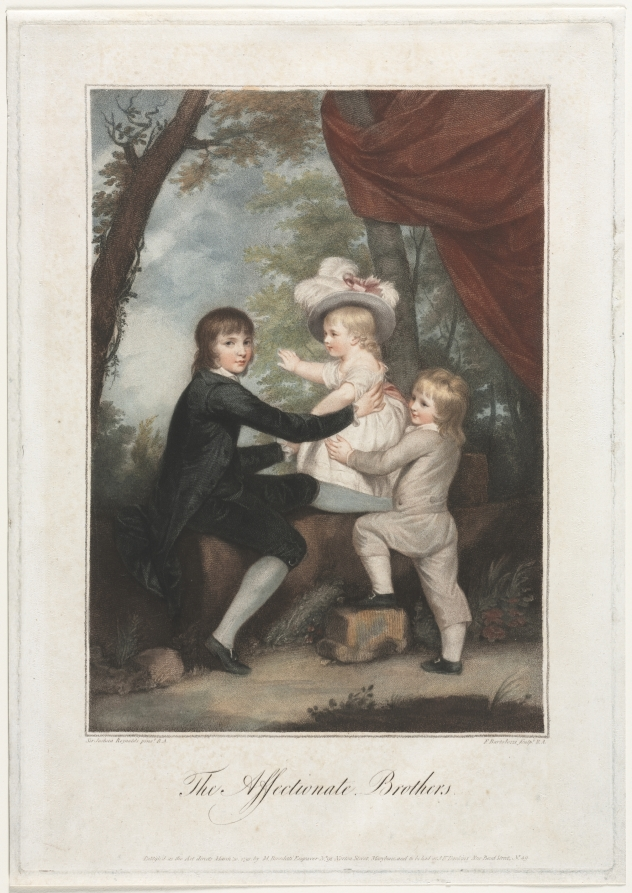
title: The Affectionate Brothers (The Lamb Children)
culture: England, 18th century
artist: Francesco Bartolozzi (British, 1727–1815)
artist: after Joshua Reynolds (British, 1723–1792)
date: 1791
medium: color stipple engraving and etching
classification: Print